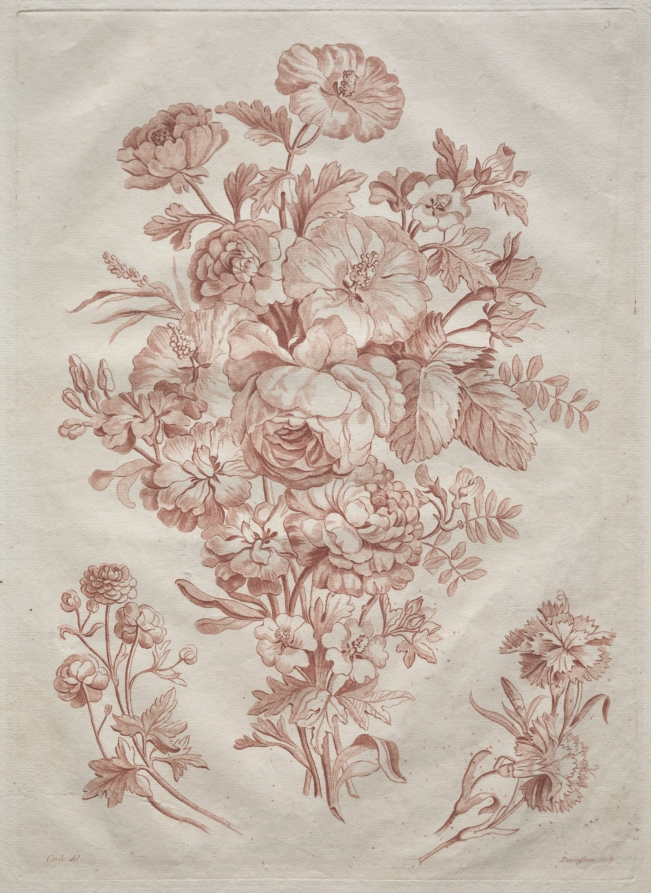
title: Spray of Flowers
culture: France, 18th century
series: Étude de fleurs d'après nature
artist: Roubillac (French, 1739-)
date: c. 1774–1800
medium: crayon manner etching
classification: Print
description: Crayon manner etching was invented in the 18th century to simulate the texture of chalk drawings, which were very popular at the time. A tool with toothed points of varying thicknesses set at irregular intervals and angles (mattoir) imitated the random character of grains of chalk on textured paper. Etudes de fleurs d’après nature demonstrates how prints propagated floral designs that could be used in the applied arts. Artisans designing textiles or decorating furniture, for instance, were inspired by the compositions found on prints.